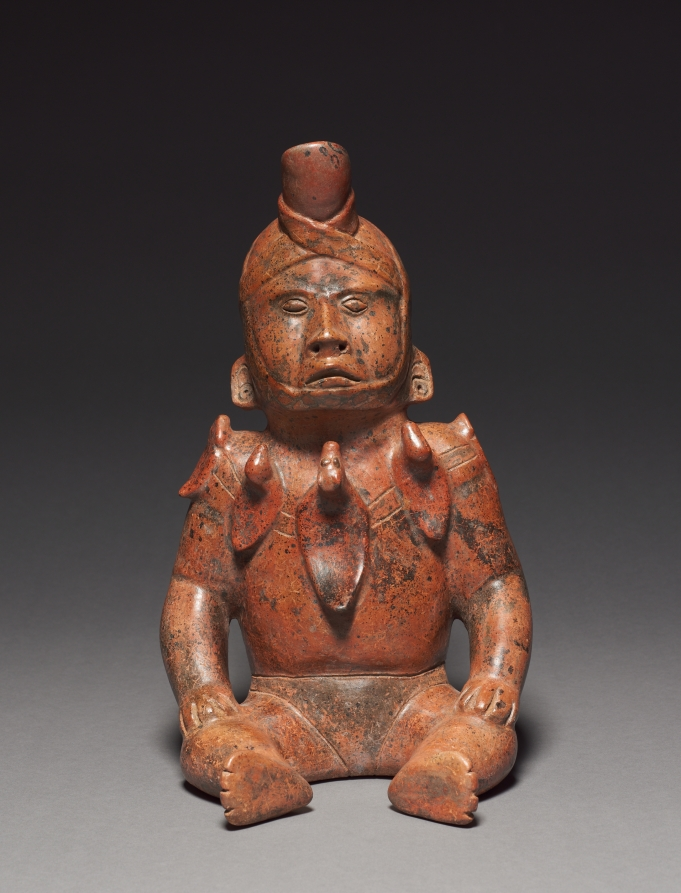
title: "Horned" Male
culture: West Mexico, Colima, Comala style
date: 100 BCE–300 CE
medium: earthenware with colored slips, black burial deposits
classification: Sculpture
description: This figure’s concentrated, otherworldly expression is emphasized by the hornlike element strapped to its forehead. This "horn" may be the spire of a conch shell, which comes from water and, therefore, refers to fertility—likely an important ritual concern of West Mexican chiefs. The element also could represent the "horn of power" worn in some areas of the world by shamans, the spiritual leaders and healers of small, nonindustrial societies.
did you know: This figure’s “horn” may be the spire of a conch shell, a reference to fertility.